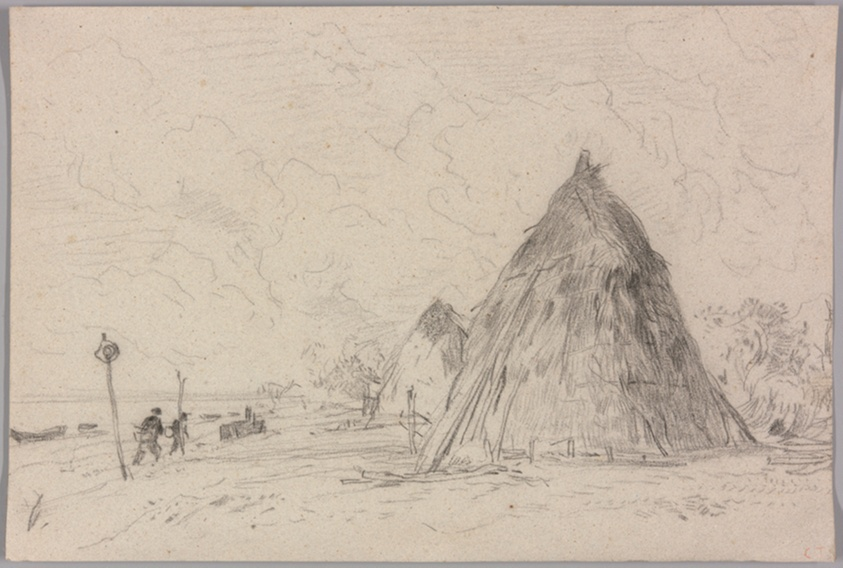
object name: Drawing and Watercolor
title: Landscape with Haystacks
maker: Constant Troyon (French, 1810-1865)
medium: Conté crayon on gray-blue wove paper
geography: France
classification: drawings (visual works); conté crayon; paper; prints and drawing